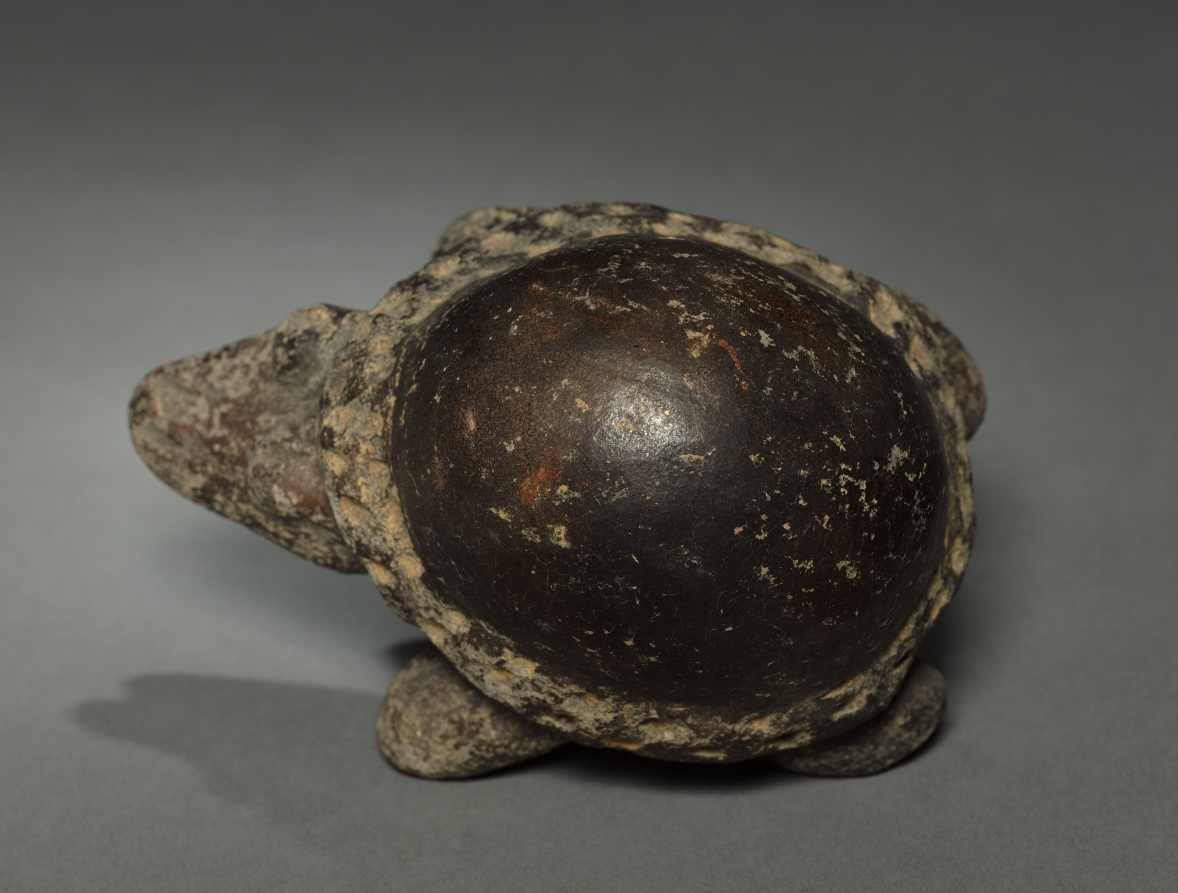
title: Turtle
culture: Colombia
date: before 1921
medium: pottery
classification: Ceramic